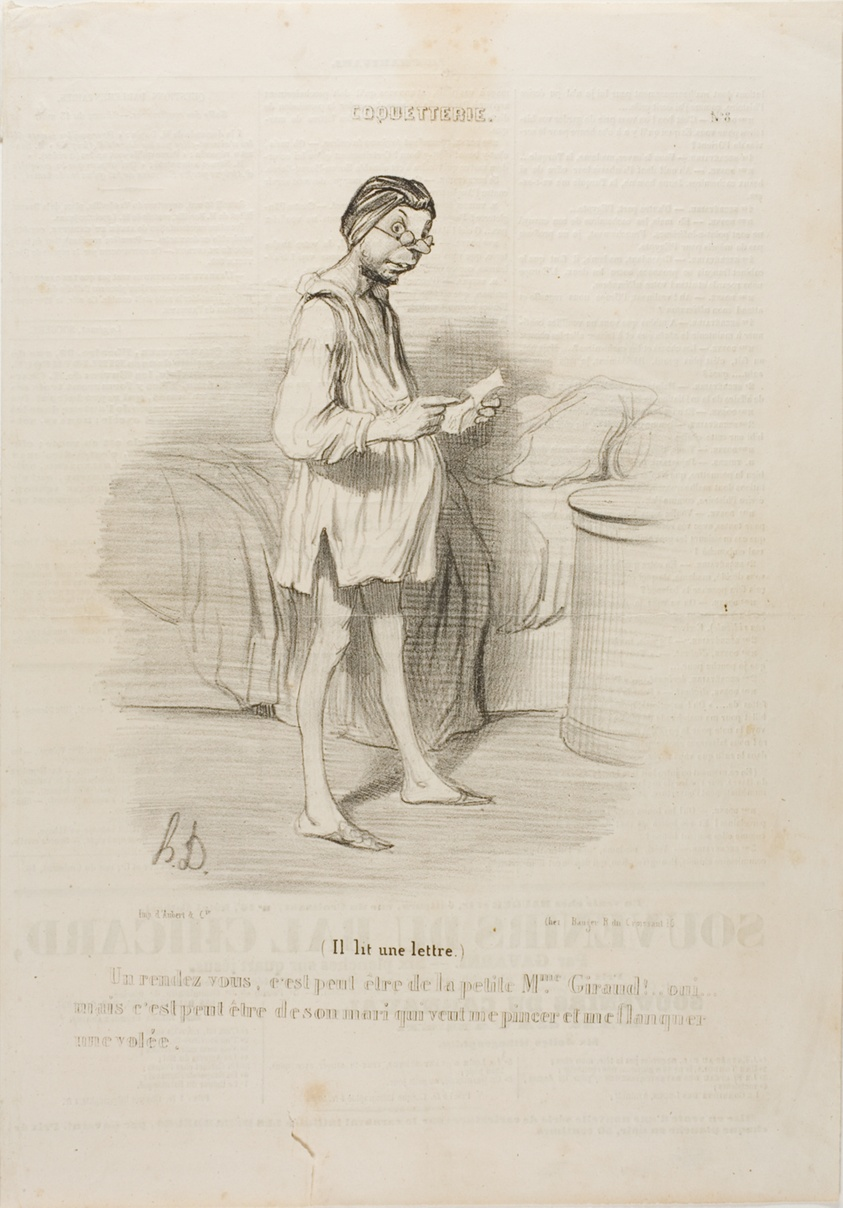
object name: Print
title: (He is reading a letter) “A date, could it be from the cute Mme Giraud?? Yes, but it could also come from her husband who wants to pinch me…,” plate 8 from Coquetterie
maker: Honoré Victorin Daumier; French, 1808-1879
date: published May 14, 1840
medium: Lithograph in black on cream wove paper, with text added in another hand and letterpress verso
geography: France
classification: lithograph; print; prints and drawing